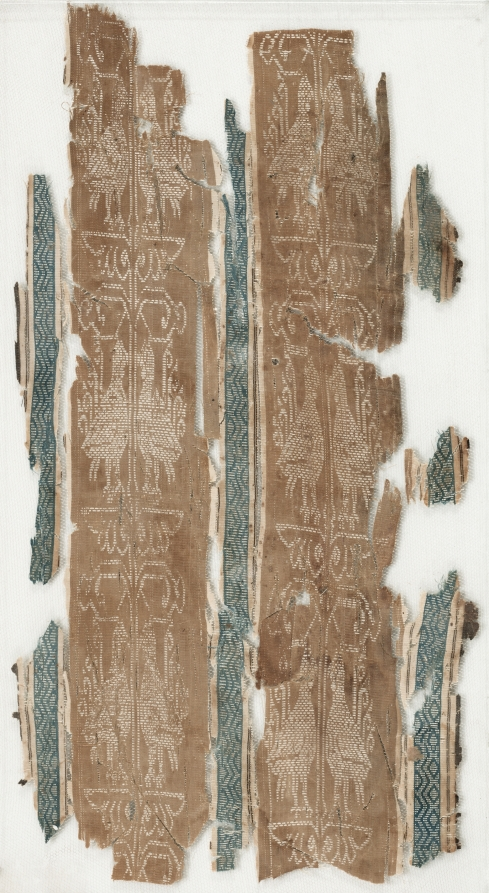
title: Silk fragment with striped pattern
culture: Syria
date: 900s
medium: plain weave variation with supplementary weft: silk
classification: Textile